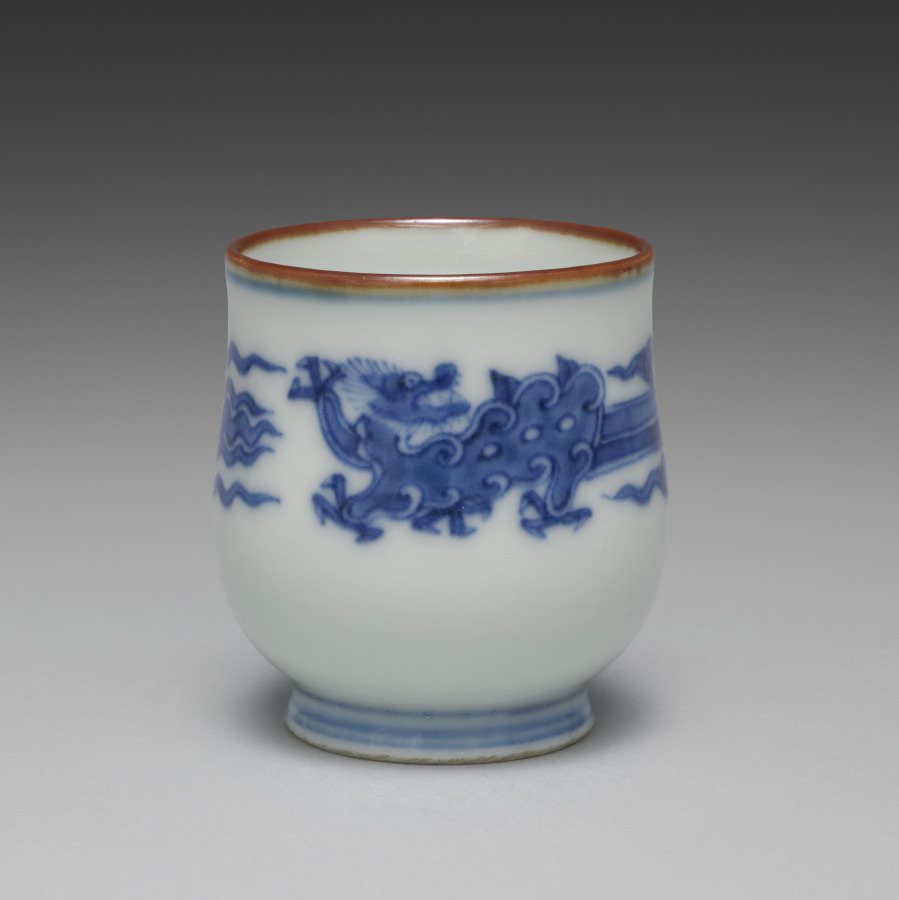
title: Cup from Sake Cups with Dragons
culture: Japan, Meiji period (1868–1912)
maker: Seifū Yohei III (Japanese, 1851–1914)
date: c. 1893–1914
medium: One from a set of six sake cups; porcelain with underglaze blue and iron oxide rims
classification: Ceramic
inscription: 大日本清風造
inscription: 清風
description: Each of these sake cups pictures two backward-looking dragons. The highly stylized creatures resemble jade carvings.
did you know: Seifū Yohei III was inspired by the Chinese mythical animals that were common on porcelain objects made at Jingdezhen in China during the Ming dynasty (1368–1644) and then exported around the world.